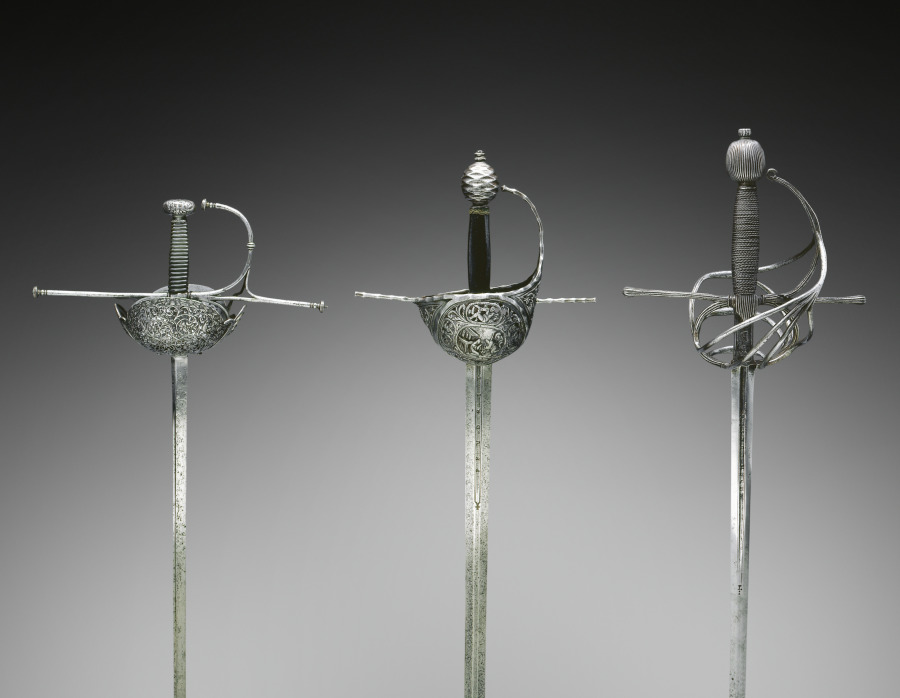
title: Cup-Hilted Rapier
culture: Italy, Milan?, 17th century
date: c.1610–30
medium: steel, pierced, chased and chiseled; wire ferrules on leather-covered wood grip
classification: Arms and Armor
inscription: inscribed on blade: FPNDRITH (on one face) RDFTPHNI (on the other)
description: The rapier was a sword worn with civilian dress and used in duels. The term rapier derives from a 16th-century French word rapière, which in turn derived from the Spanish espada ropera, or “dress sword.” The rapier was a light weapon with a straight double-edged and pointed blade that, with the development of the art of fencing in the 1500s and 1600s, gradually became narrower and lighter, and thus suitable for thrusts only. With the new technique of swordplay emphasizing the point of the blade, sword guards became more complex to protect the duelist’s unarmored hand. These elaborate guards were frequently decorated by various techniques—chiseling, bluing, russeting, and damascening.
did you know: Over time the blade of a rapier became longer, based on a belief that a longer blade made it easier to hit one's adversary and, at the same time stay beyond the reach of his weapon.